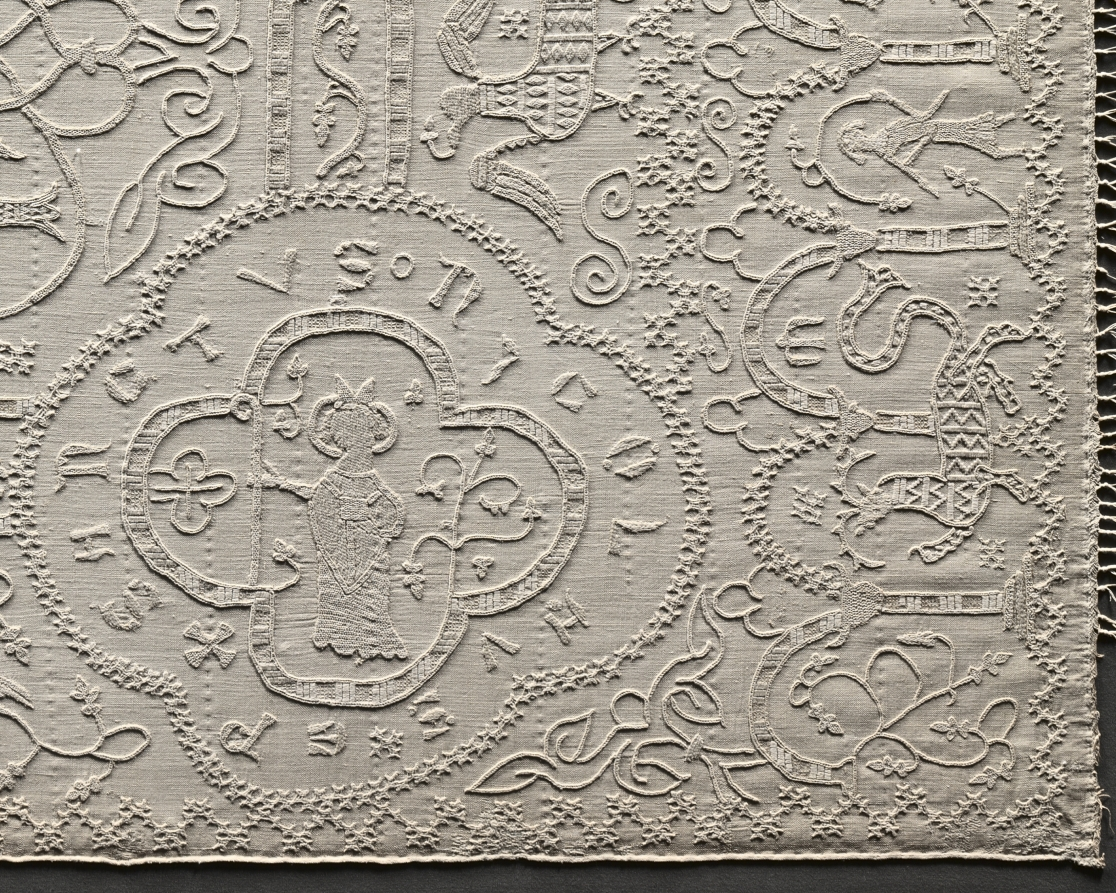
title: Altar Cloth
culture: Germany, Altenberg on the Lahn, Premonstratensian Convent, 14th century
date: c. 1350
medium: embroidery: linen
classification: Embroidery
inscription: various motifs enclosed in quatrefoils with identifying inscriptions in Gothic letters.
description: This large, embroidered altar cloth is one of the rarest, most important medieval church furnishings in existence. It was stitched by nuns in the Premonstratensian Convent in Altenberg on the Lahn River, north of Frankfurt, Germany, and was used to cover the church’s high altar in the weeks leading up to Easter. The cloth is an example of linen embroidery, a specialty of German nuns in the later Middle Ages. The Altenberg monastery church once had valuable furnishings; the high altar retable (a decorated frame with sculptures and paintings on the top of an altar) has survived, the main parts of which are now in the Städel Museum in Frankfurt, Germany.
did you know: When lit from behind, the previously hidden details emerge and the complex design becomes evident.